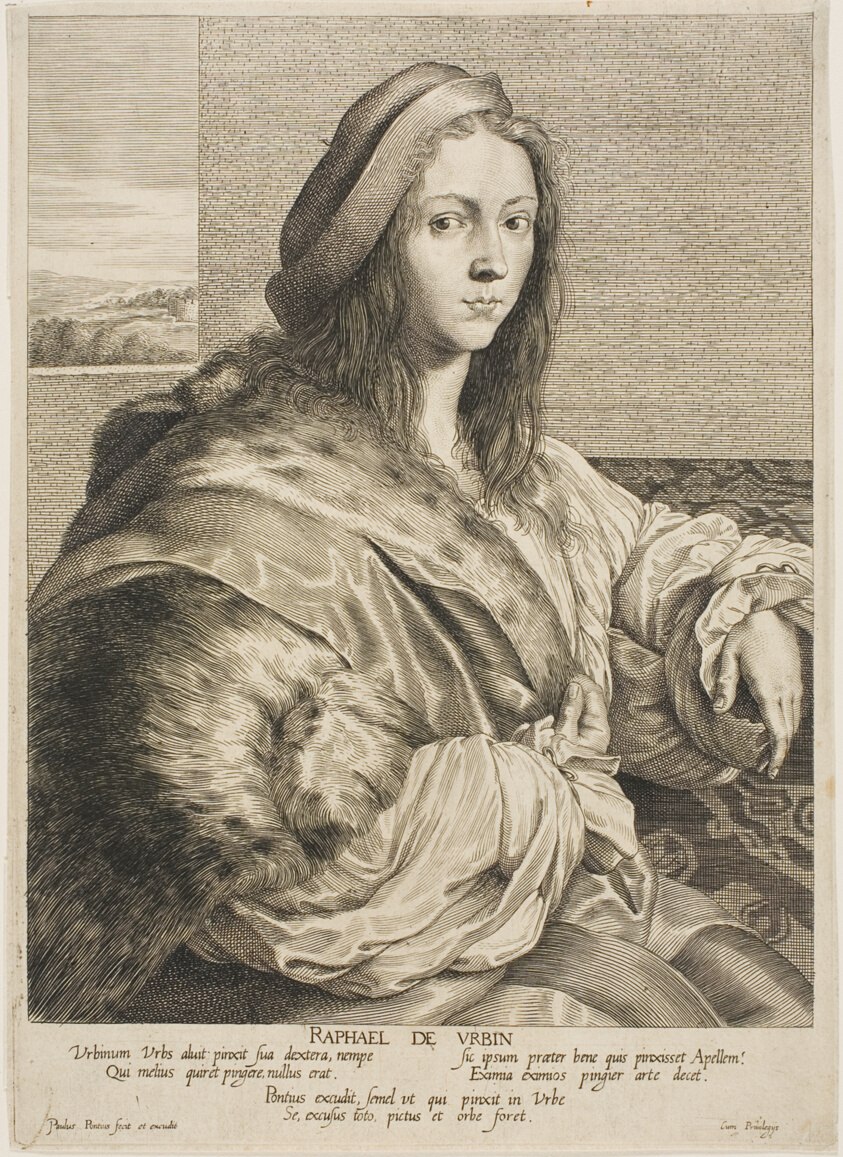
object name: Print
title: Portrait of Raphael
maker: Paul Pontius (Flemish, 1603-1658)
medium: Engraving in black on paper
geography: Flanders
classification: print; prints and drawing